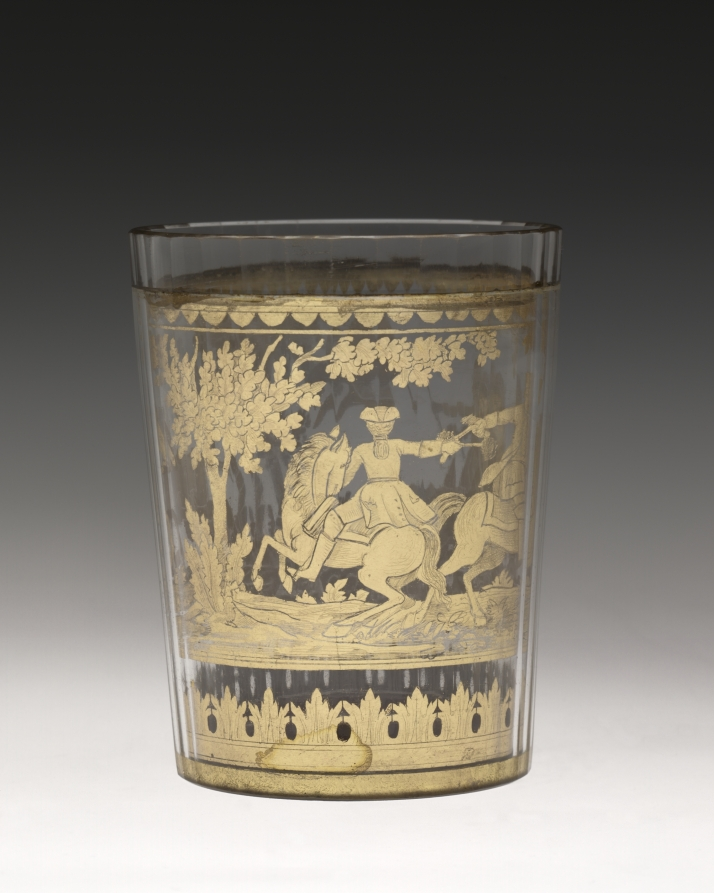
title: Tumbler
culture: Bohemia, 18th century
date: c. 1730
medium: zwischengoldglas (glass)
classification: Glass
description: Small beakers, or tumblers, were used to drink various types of spirits, cordials, and fortified wines, like sherry and port. “Gold between glass” (Zwischengoldglas) was a labor-intensive and costly technique practiced in Bohemia (present-day Czech Republic) and Austria in the 1700s. A gold-leaf design was affixed between two glass vessels that were then precisely fit together and fused. In this example, the gold leaf portrays a boisterous hunting scene. When the glass is tipped and emptied, the interior reveals that two hunting dogs have killed a hare.